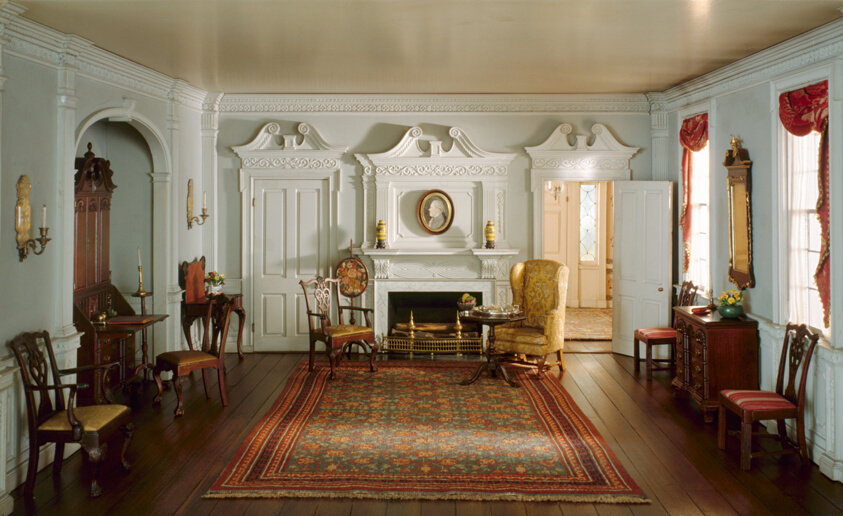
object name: Miniature room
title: A11: Rhode Island Parlor, c. 1820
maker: Designed by Narcissa Niblack Thorne; American, 1882-1966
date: c. 1940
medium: Miniature room, mixed media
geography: United States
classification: miniature; thorne rooms